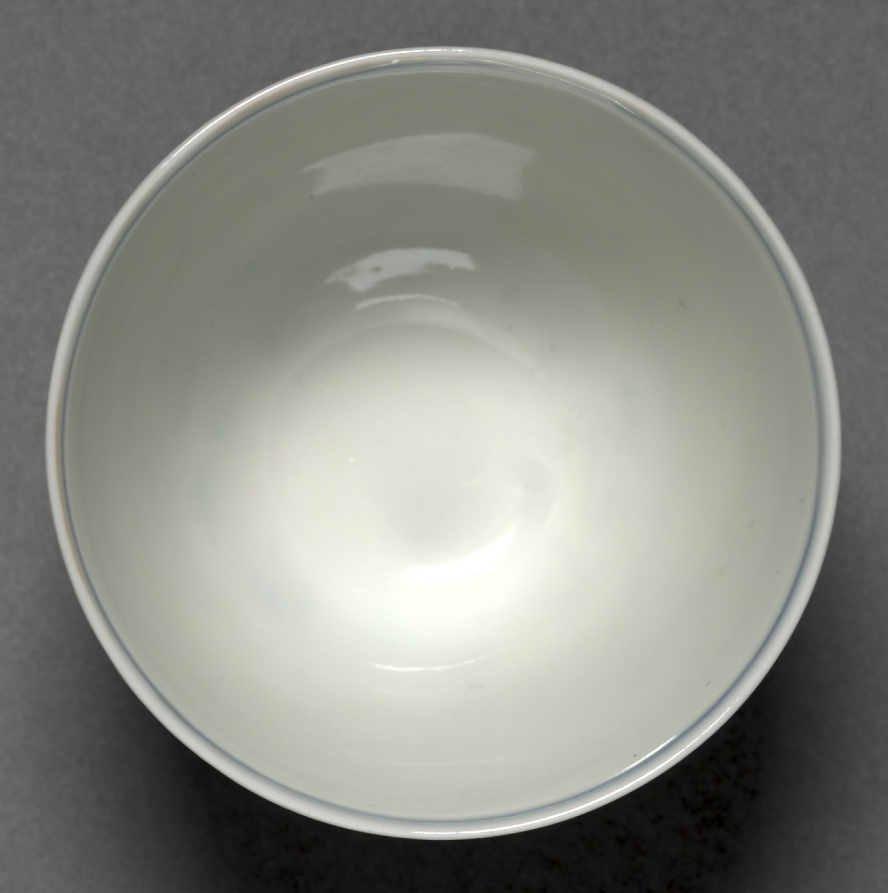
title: Wine Cup with Children at Play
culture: China, Jiangxi province, Jingdezhen, Ming dynasty (1368-1644), Chenghua mark and period (1465-1487)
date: 1465–87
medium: porcelain with underglaze blue and overglaze enamel decoration, docai ("joined colors") ware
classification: Ceramic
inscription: 大明成化年製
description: This delicate wine cup, only two inches high, exhibits free, spontaneous drawing as well as perfect compositional balance over its small surface area. The motifs were outlined with cobalt blue; the piece was then glazed and fired in the normal way for making the blue-and-white ware. After firing, the outline painting was completed with colored enamels over the glaze. The piece was fired the second time. The pictorial decoration is refined and complicated; the porcelain body is of exceptionally high quality and is thin, translucent, and light in weight.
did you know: Chenghua ware demonstrates one of the high points of technological accomplishment in Chinese porcelain production.